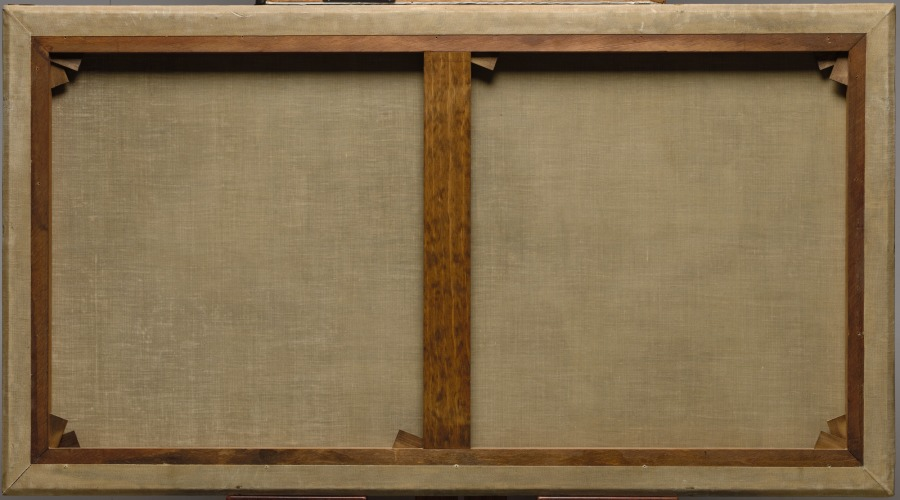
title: Vale of Kashmir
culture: America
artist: Robert S. Duncanson (American, 1821–1872)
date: 1867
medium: oil on canvas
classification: Painting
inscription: Inscribed at lower right: Duncanson. / 1867. / Cinti O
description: Cincinnati-based Duncanson was the first African American artist to achieve recognition both nationally and abroad. This panoramic painting, one of his grandest, was inspired by an episode in Thomas Moore’s then-popular epic poem, Lalla-Rookh (1817), which describes a Persian princess’s journey to the Indian subcontinent to be married. In Duncanson’s conception, members of a courtly entourage depart a quasi-Islamic palace, arriving by boat onto a scrim of land where they ascend a monumental staircase to a plaza with a fountain spraying an impressive plume of water. Despite these substantial storytelling details, the human elements remain subordinate to the overwhelming splendor of the natural landscape in and of itself.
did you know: During the Civil War, Duncanson relocated to Montreal, where he inspired several Canadian landscape painters.